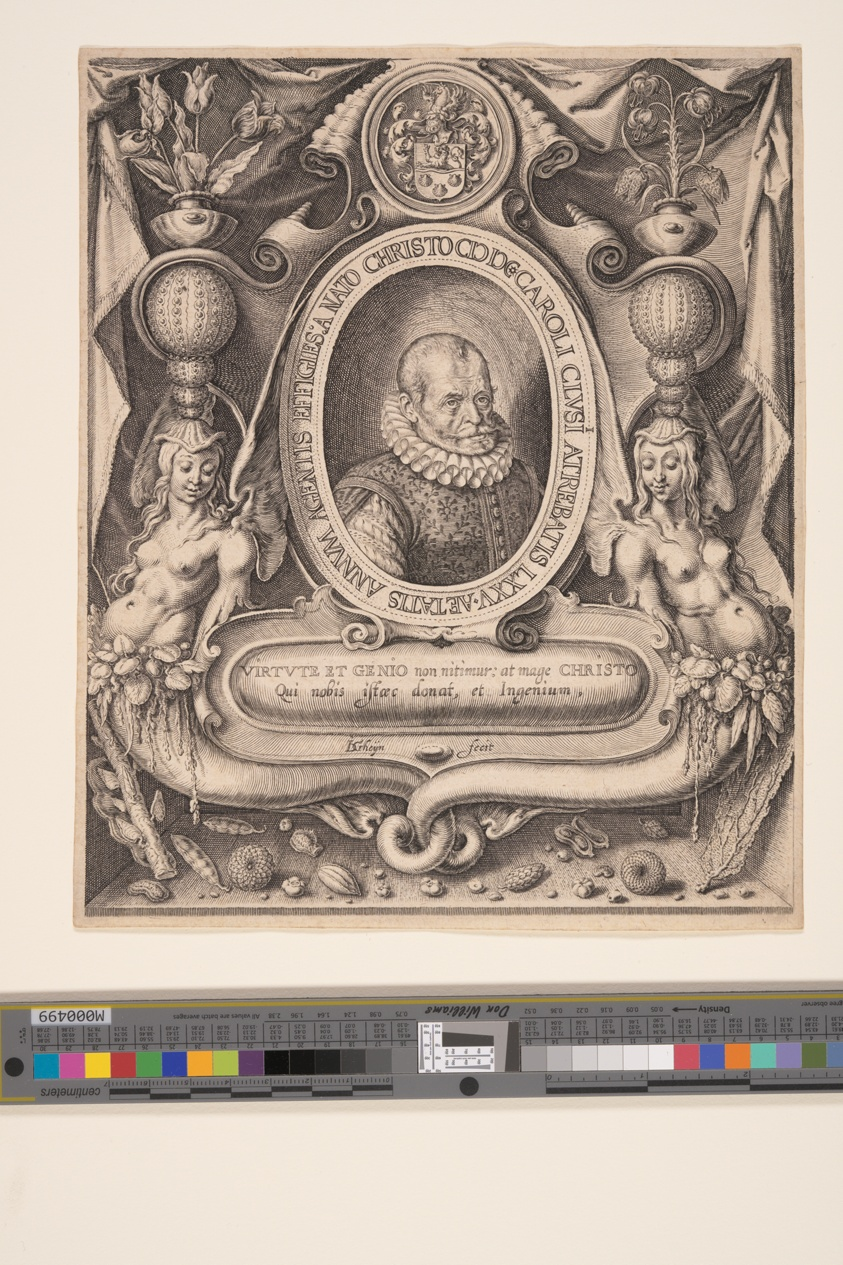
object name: Print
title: Carolus Clusius, Physician and Botanist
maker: Jacques de Gheyn II; Dutch, 1565–1629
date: 1601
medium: Engraving on laid paper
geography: Netherlands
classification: print; engraving; paper; prints and drawing